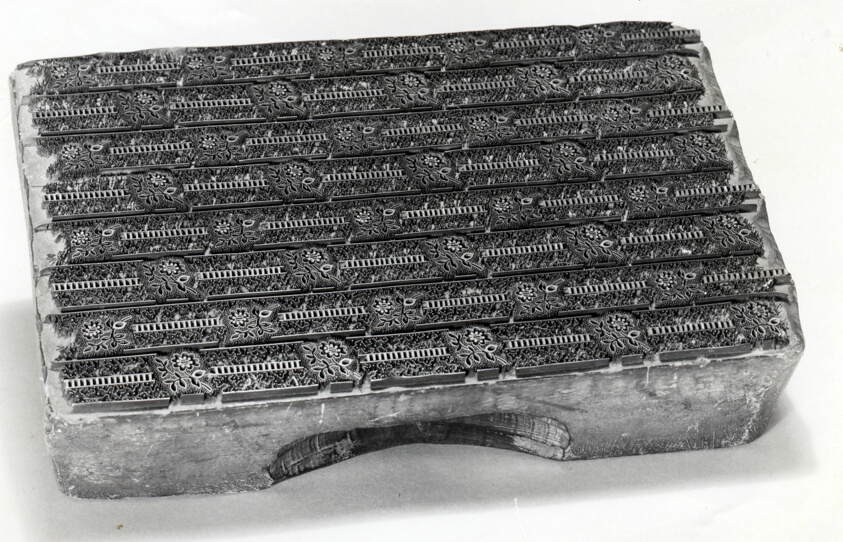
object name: Textile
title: Printing Block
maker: France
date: 18th century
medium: Wood, metal pins and strips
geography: France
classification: printing blocks (printing surfaces); textile